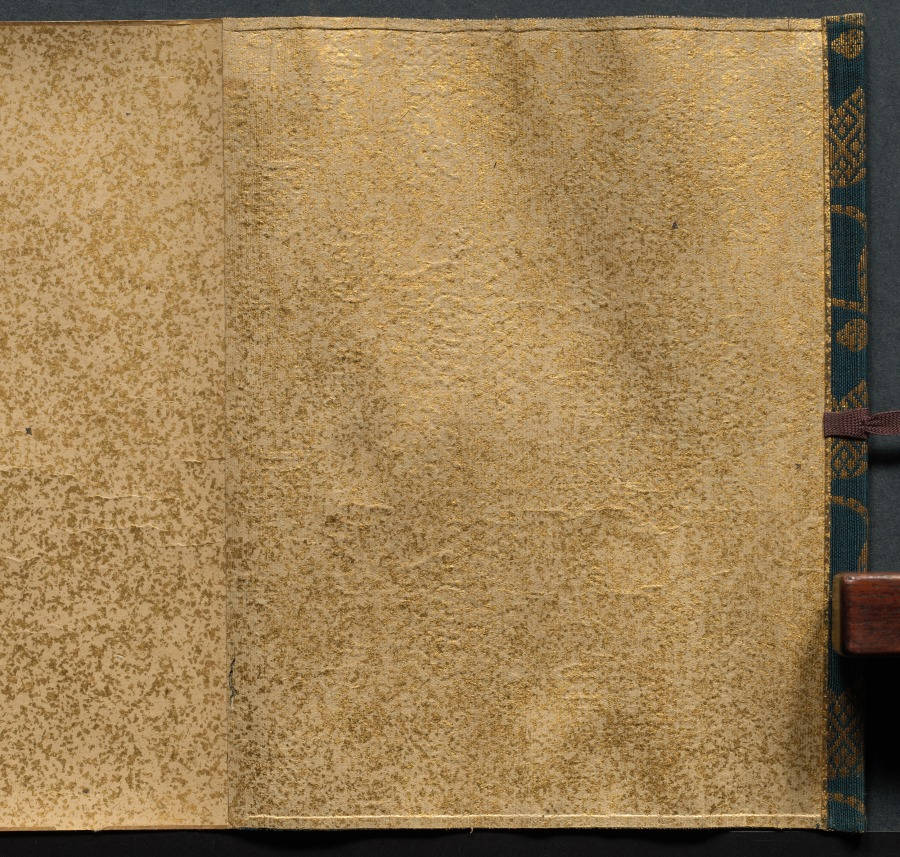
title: Plum Blossoms and Peonies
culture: China, Qing dynasty (1644-1911)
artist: Gao Fenghan (Chinese, 1683–1749)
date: 1741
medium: handscroll, ink on paper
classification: Painting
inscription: Artist's 2 inscriptions and 9 seals (the painting of Peonies with the artist's colophon and the colophon by Hou Chia-fan are on a single sheet of paper). Artist's inscription and 2 seals (Plum Blossoms): [seal] Ts'ai-yün. After finishing writing my colophon, I unrolled the painting to take another look, and it now seems that the composition here should have moved to the later part of the scroll. If that is the case, then the "Cool Beauty" [prunus] of the Solitary Hill is after all unable to take precedence over the "King of Flowers" [peony]. A laugh. Lao-fou inscribed. [seal] Feng-han. Artist's colophon (Plum Blossoms): [3 seals] Tun; Yen-yün-kung-yang, Hou-shang-tso-sheng. A few days after I painted this scroll for Shui- hsien [Yüeh Meng-yüan], the plum blossoms were in full bloom at his residence. He invited me over to enjoy them together for a long while, and I composed two additional poems and wrote them down here for his criticism. [Poems on the colophon are not translated.] First month, twenty-first day, your junior, Kao Feng-han of Nan-fou drafted this with the left hand. [seal] Feng-han. Artist's inscription and 4 seals (Peonies): Brushed with the left hand in the hsin-yu year [1741]. [seal] Yu-hsi. [3 seals at end of painting] Hou-shang-tso-sheng; Yen-yün-kung-yang; Shih-tsao-wu. Artist's colophon and seal (Peonies): The imperial concubine from the Yang family loved to dress in red, And from the emperor won the title of Hai-t'ang. But ever since she became the new dream of the moon palace, She changed into rainbow colors, while learning to dance. After I wrote the poem on Looking for Plum Blossoms in the Teng-wei Mountains, I attached to it a few branches of prunus, some bamboo tips and a piece of rock, with a scattering of green [moss] here and there to fill up the scroll. Unexpectedly, my playful fascination [with these subjects] was still not quite satisfied, so I made up these amorous ideas and romantic images [of the peony], to follow the footsteps of the fair lady of the Ku-hsieh Mountain [prunus]. Furthermore, I picked out one poem to be my vanguard. Perhaps such luminosity of wealth and power will be enough to overwhelm the poor fellows, and [they] will not mind the comparatively short length [of paper] assigned to it. Amusingly inscribed. Please correct me again. To Shui-hsien, my learned senior, your junior Han inscribed again. [seal] Tso-hua [left-handed painting]. 1 additional colophon and 5 additional seals: 1 colophon, dated 1742, and 3 seals of Hou Chia-fan (act. ca. 1742); 1 seal of P'u Ch'üan (20th c.?); 1 seal of Li family (dates unknown).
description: One of the so-called Yangzhou Eccentrics (a group of painters who lived in Yangzhou and were known for their unorthodox art and lifestyle), Gao Fenghan depicts China’s two most loved flowers in full bloom—the “cold beauty,” or plum blossom, in the first section, and the “king of flowers,” or peony, in the second section. Painted in 1741, the year when Gao decided to leave the south and return home to Shandong province in eastern China, this work was likely a token of farewell. His casual brushwork may indicate his mental and physical struggle at the time. After having crippled his right hand in 1737, Gao used his left hand to paint and achieved a crudeness and eccentric style unattainable before.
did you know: In East Asian art, peonies traditionally symbolize prosperity and wealth.